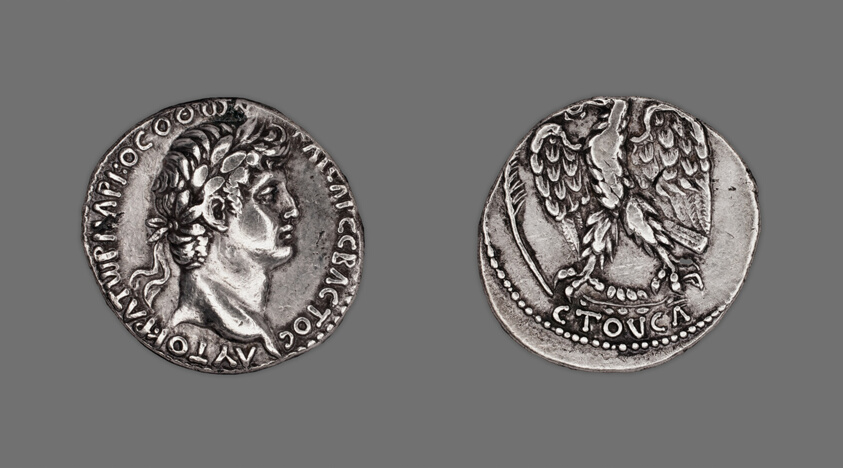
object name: Coin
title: Tetradrachm (Coin) Portraying Emperor Otho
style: hellenistic, ancient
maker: Roman, minted in Antioch, Syria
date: 69, issued by the city of Antioch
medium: Silver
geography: Antioch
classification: coin; ancient art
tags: animals